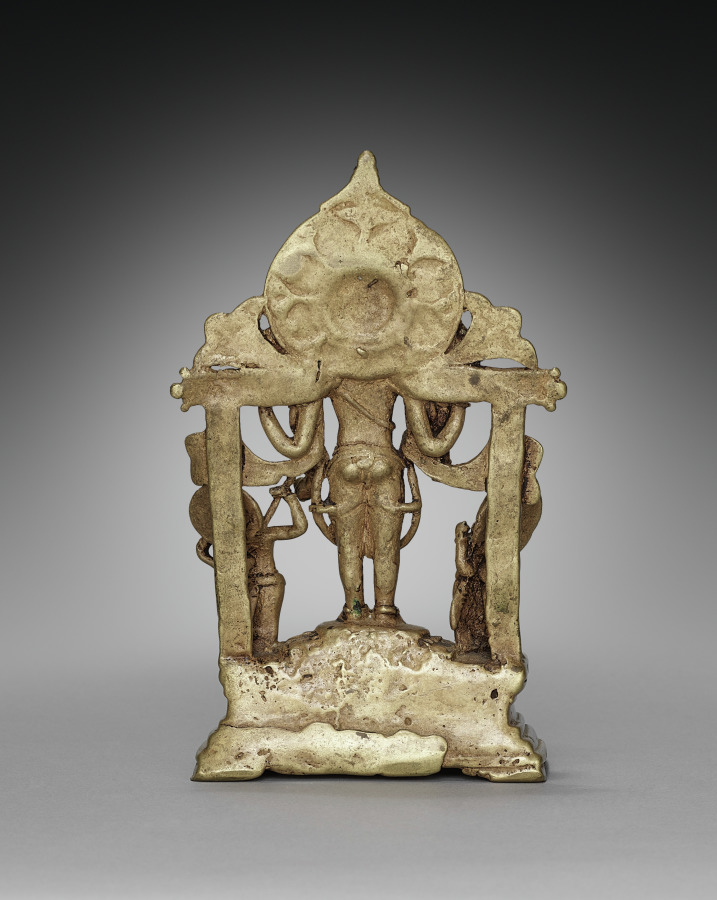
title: Standing Vishnu with Attendants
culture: India, Kashmir, 9th century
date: 800s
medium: brass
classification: Sculpture